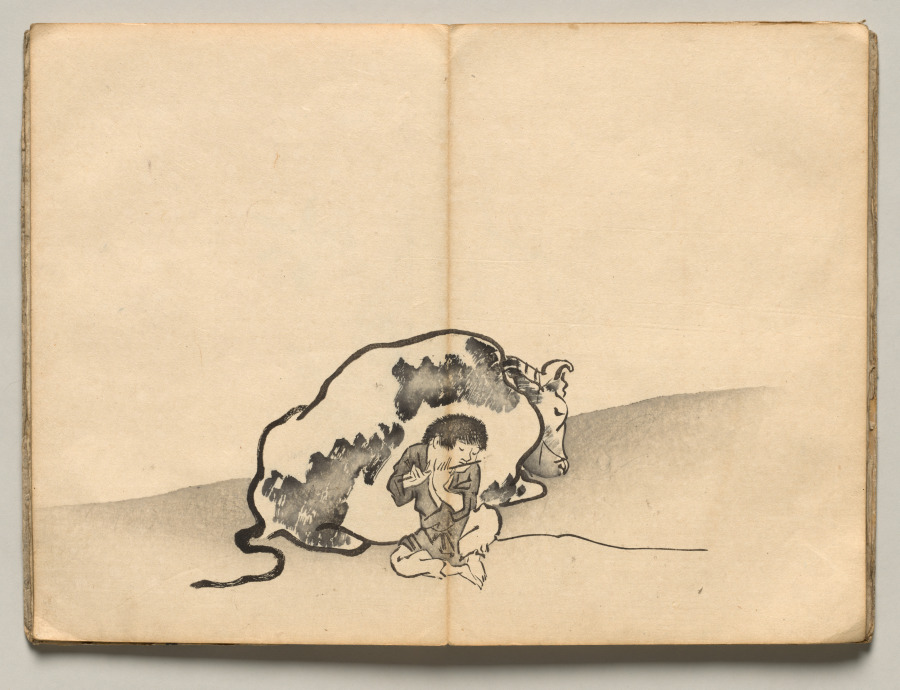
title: Oxherd from Ōkyo Picture Book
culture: Japan, Edo period (1615–1868)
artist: after Maruyama Ōkyo (Japanese, 1733–1795)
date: 1850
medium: accordion-style woodblock printed folding-book; ink and color on paper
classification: Bound Volume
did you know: This impression of a book of woodblock-printed designs is missing a spread that depicts a crane.